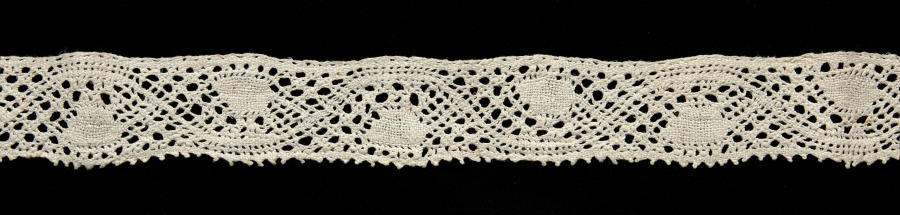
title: Lace Edging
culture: Italy, Abruzzi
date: 1800s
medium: Linen: bobbin lace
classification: Lace